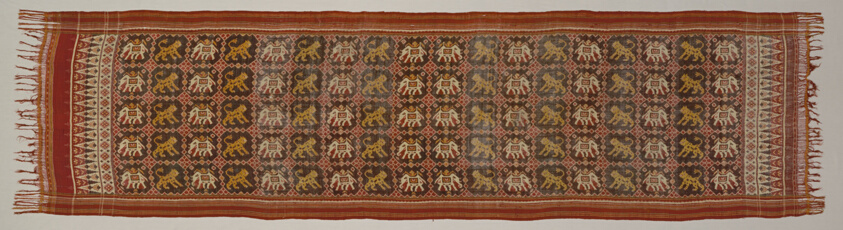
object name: Religious/Ritual Object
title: Ceremonial Cloth with Pattern of Elephants and Tigers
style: indonesian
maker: India, Gujarat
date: 19th century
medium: Silk, plain weave, warp and weft resist dyed (double ikat) and stripes of plain weave; bands of plain weave with main warp fringe; both selvages present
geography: India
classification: textile; weaving; weaving - printed; ritual objects